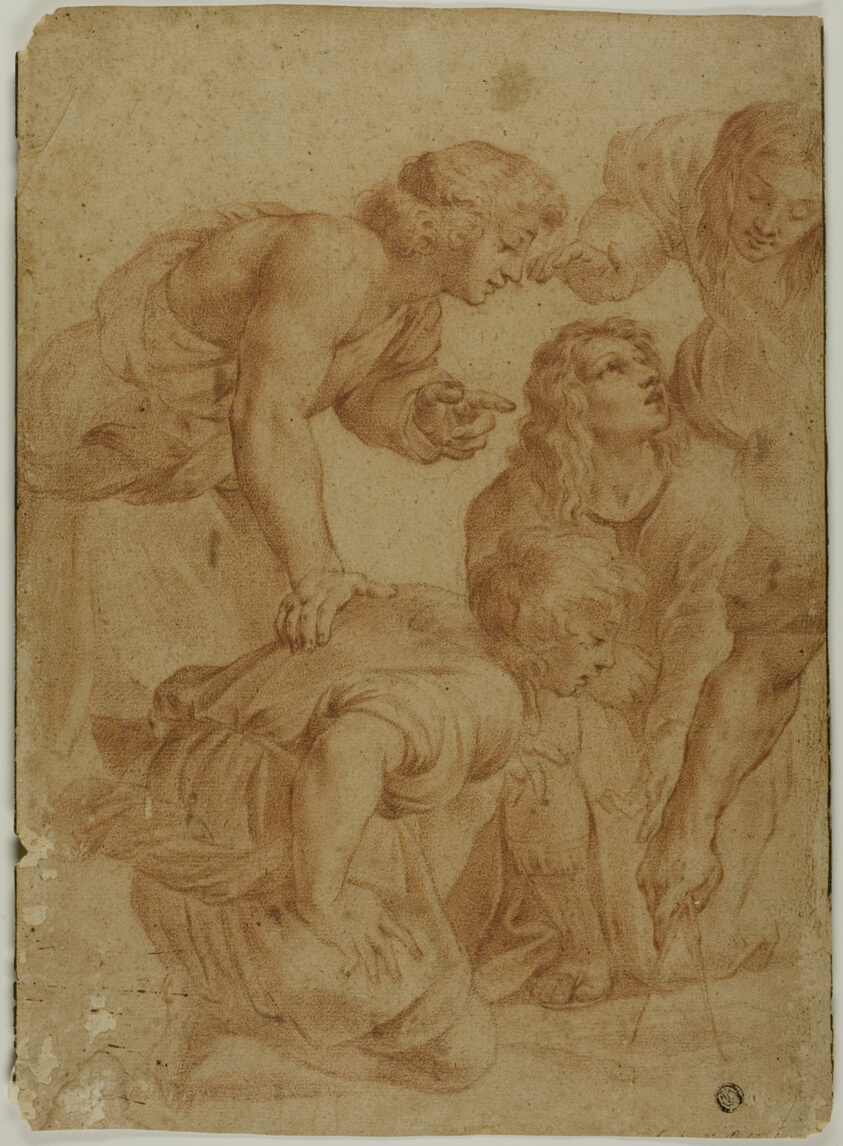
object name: Drawing and Watercolor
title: Group of Youths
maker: After Raffaello Sanzio, called Raphael; Italian, 1483-1520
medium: Red chalk, with traces of black chalk, on tan laid paper, laid down on cream laid paper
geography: Italy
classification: chalk; drawings (visual works); prints and drawing